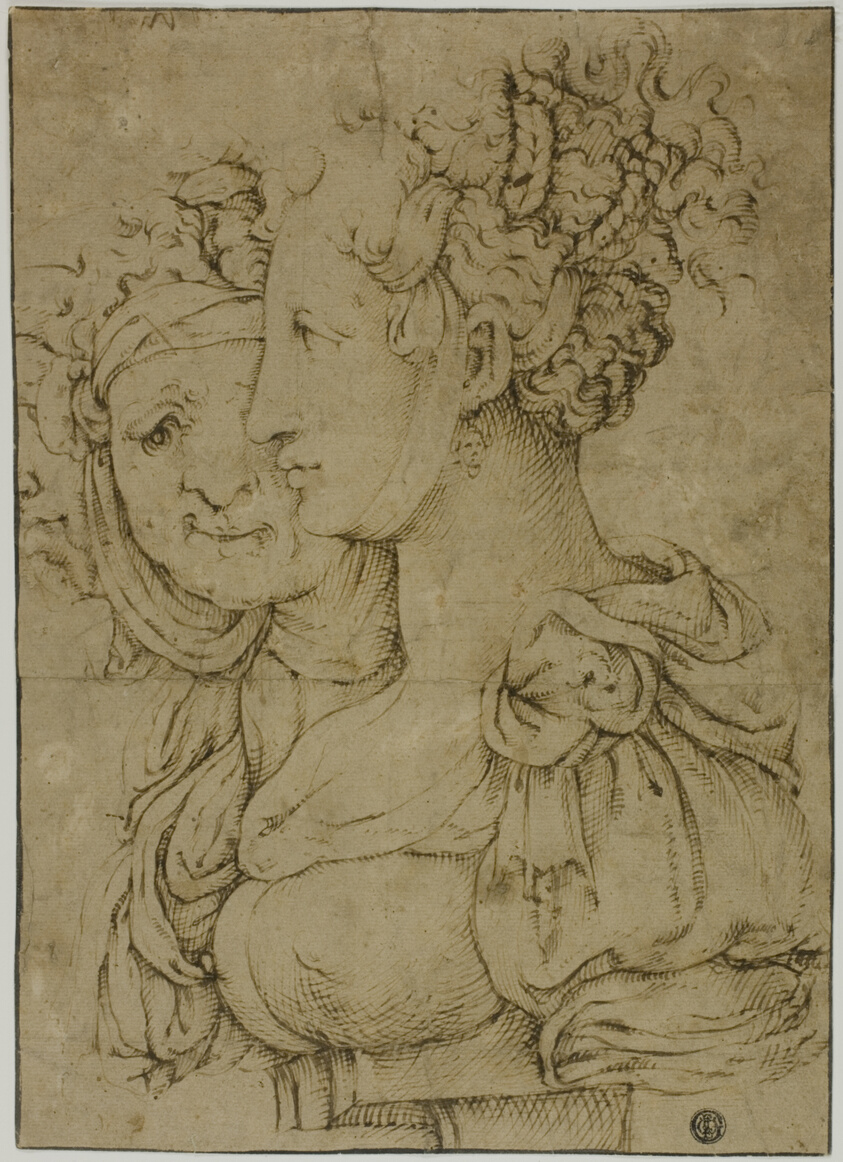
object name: Drawing and Watercolor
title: Old Matron and Young Woman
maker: Attributed to Bartolomeo Passarotti; Italian, 1529-1592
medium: Pen and brown ink on buff laid paper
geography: Italy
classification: pen and ink drawings; drawings (visual works); prints and drawing